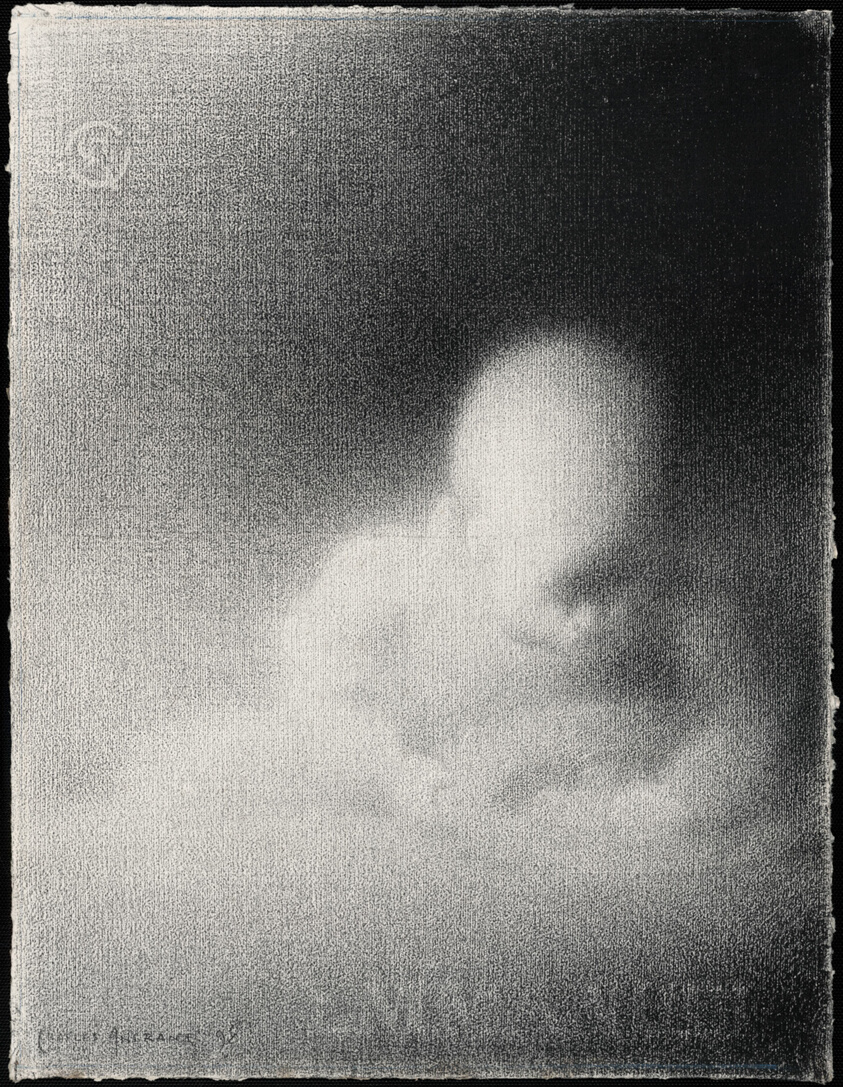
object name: Drawing and Watercolor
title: Head of a Child (Emmanuel)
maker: Charles Angrand (French, 1854–1926)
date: 1898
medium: Black Conté crayon on ivory laid paper, ruled in blue pencil at edges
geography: France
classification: prints and drawing; conté crayon; drawings (visual works)